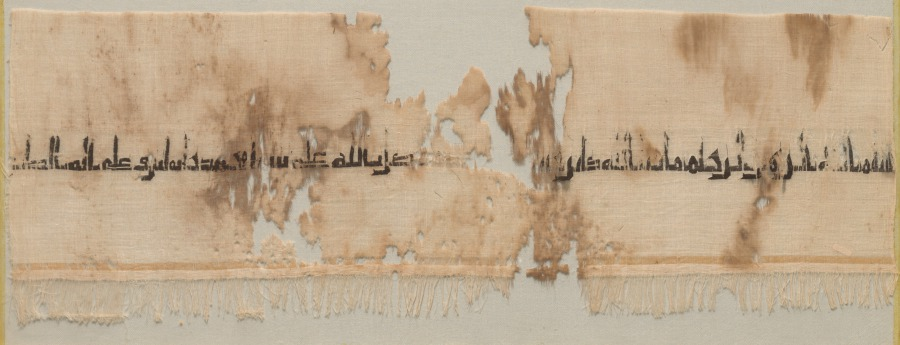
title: Fragment of a Tiraz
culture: Egypt, Ikhshidid period, probably Caliphate of al-Radi, AH 322-329 (A.D. 934-940)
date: 934 – 940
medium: tabby ground with inwoven tapestry inscription; linen and silk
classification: Textile